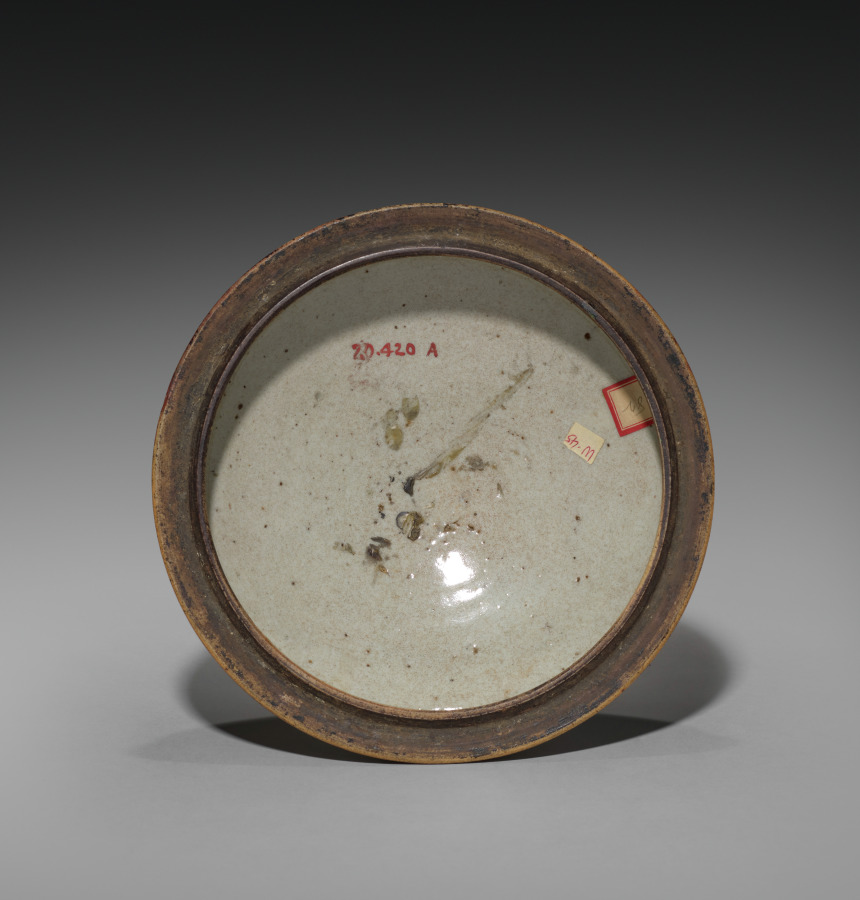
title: Jar (lid)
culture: Siam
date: 1800s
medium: porcelain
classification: Ceramic